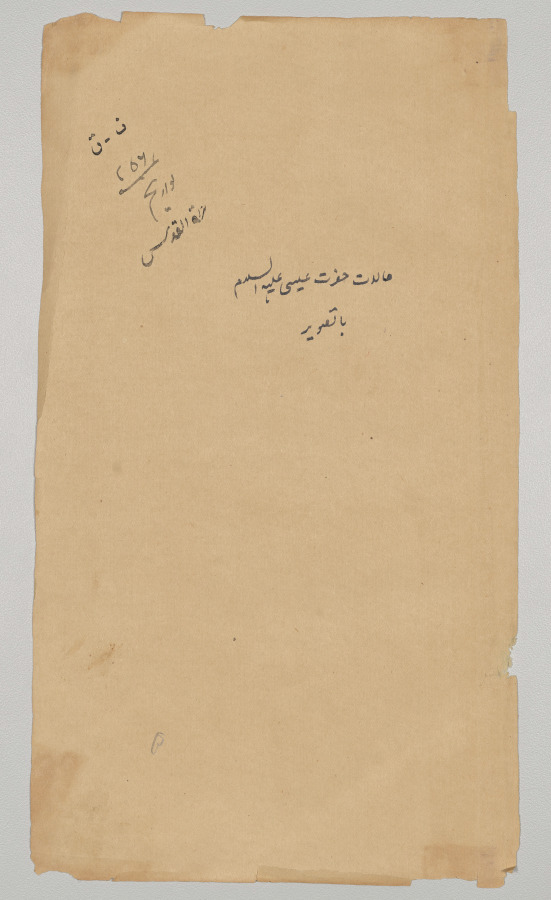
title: Text page from a Mirror of Holiness (Mir’at al-quds) of Father Jerome Xavier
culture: Mughal India, Allahabad, made for Prince Salim (1569–1627)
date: 1602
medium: Ink and gold on paper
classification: Manuscript